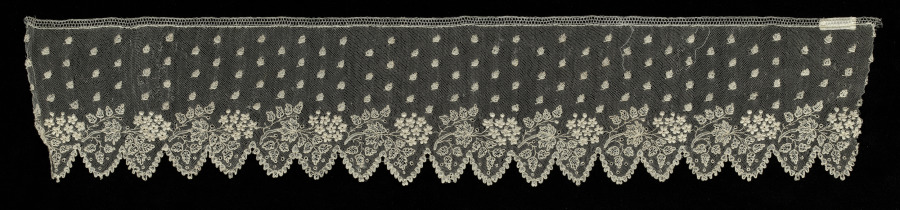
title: Lace Edging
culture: Italy, Burano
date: 1760–99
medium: Linen: needle lace (Burano Point)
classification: Lace